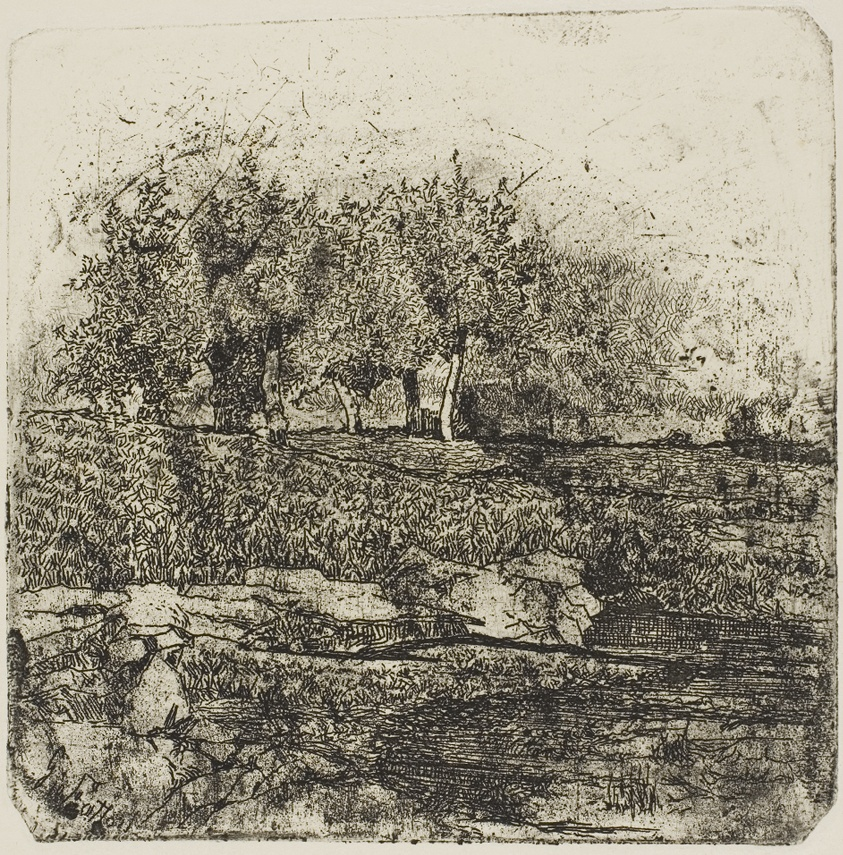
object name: Print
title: Trees in a Meadow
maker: Giovanni Fattori (Italian, 1825-1908)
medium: Etching and aquatint, from a zinc plate, in black on cream wove paper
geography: Italy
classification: etching; print; prints and drawing